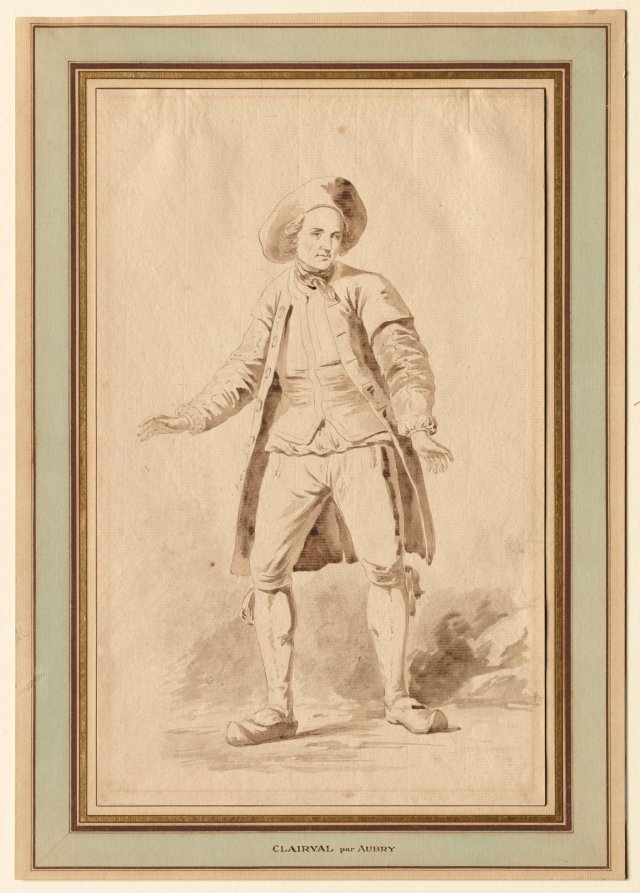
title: The Actor Clairval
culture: France, 18th century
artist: Étienne Aubry (French, 1745–1781)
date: 18th century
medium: sepia ink and wash with graphite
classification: Drawing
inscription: Mat inscribed in brown ink: Clairval par Aubry. Verso, in pencil, upper center: Clairval